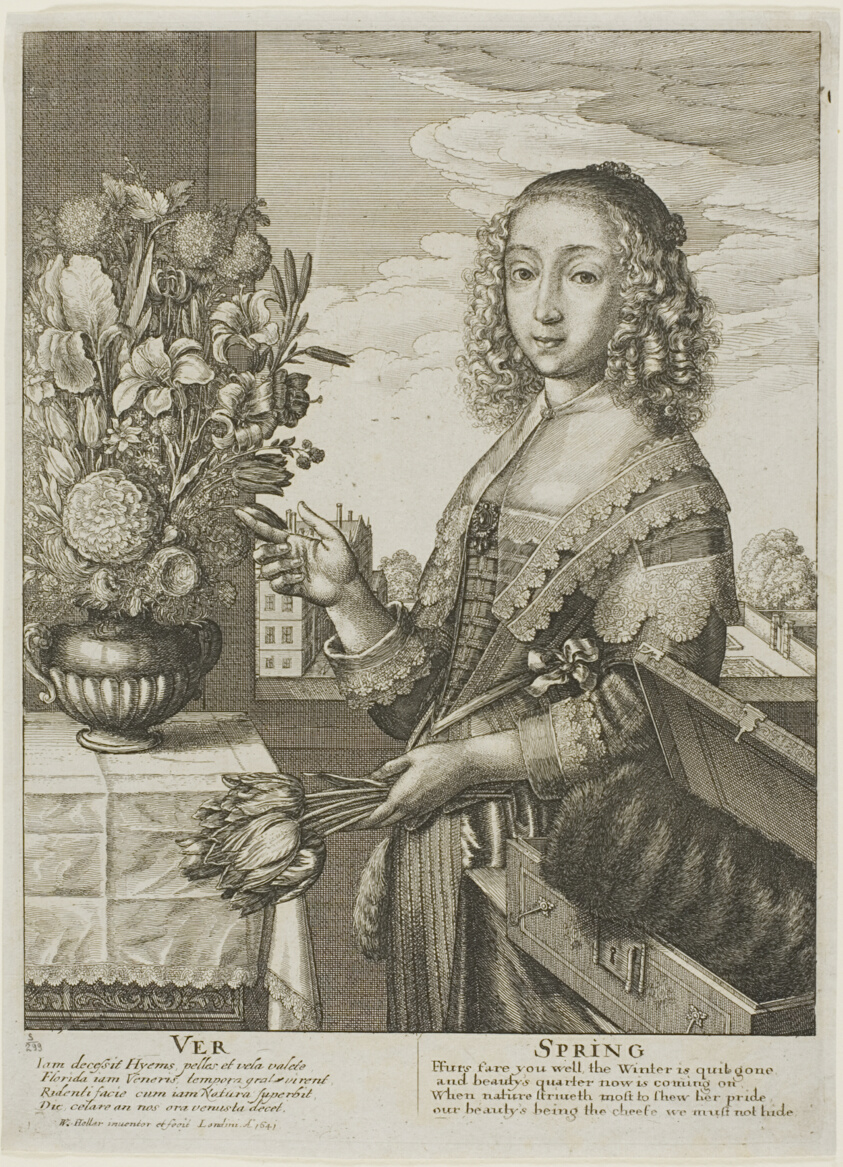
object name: Print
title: Spring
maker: Wenceslaus Hollar (Bohemian, 1607-1677)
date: 1641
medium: Etching on ivory laid paper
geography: Bohemia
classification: print; prints and drawing